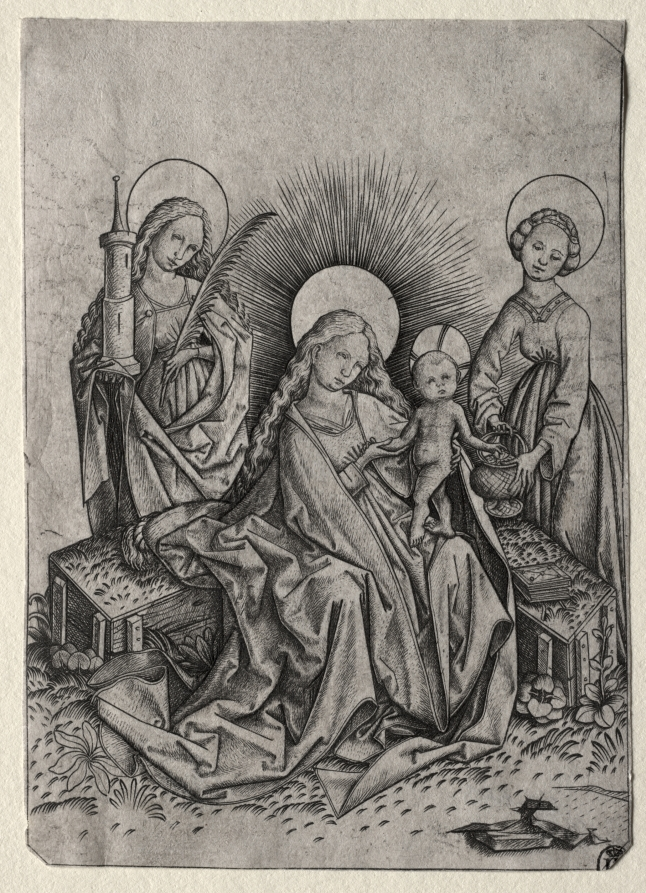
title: Madonna and Child in a Garden between St. Barbara and st. Dorothy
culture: Germany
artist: Master ES (German, active 1450–67)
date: 1450–67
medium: engraving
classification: Print